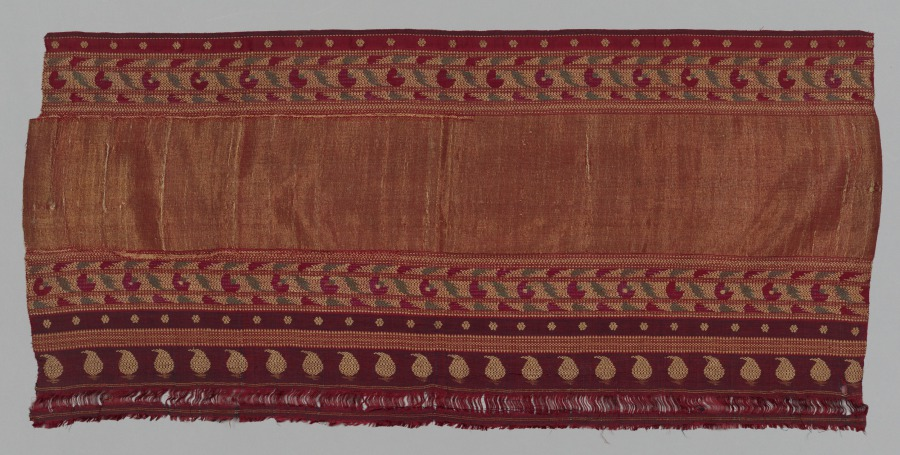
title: Part of a Sari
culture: India, 19th century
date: 1800s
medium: brocade (?)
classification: Textile